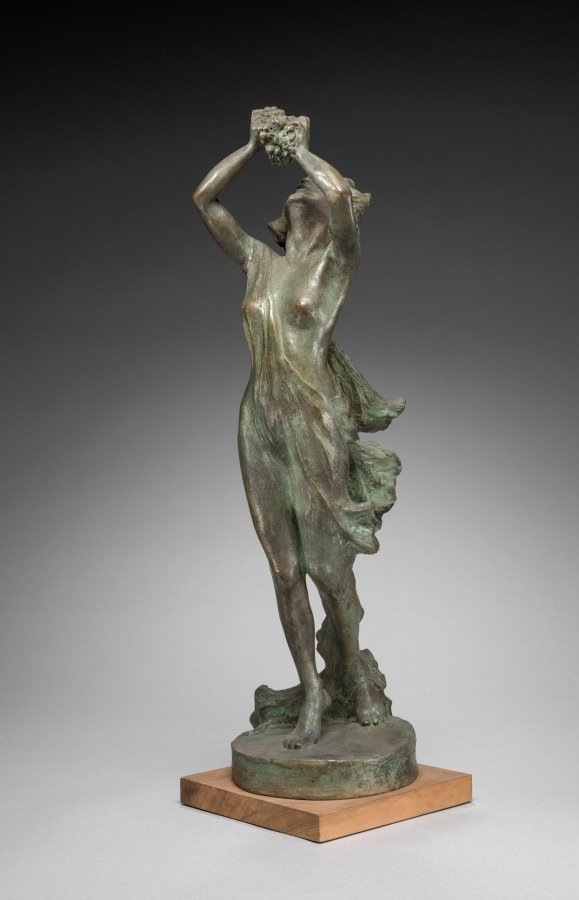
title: Fountain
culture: America, Ohio, Cleveland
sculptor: Jessica Wakem McMurray (American, born England, 1874–1950)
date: 1920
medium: bronze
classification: Sculpture